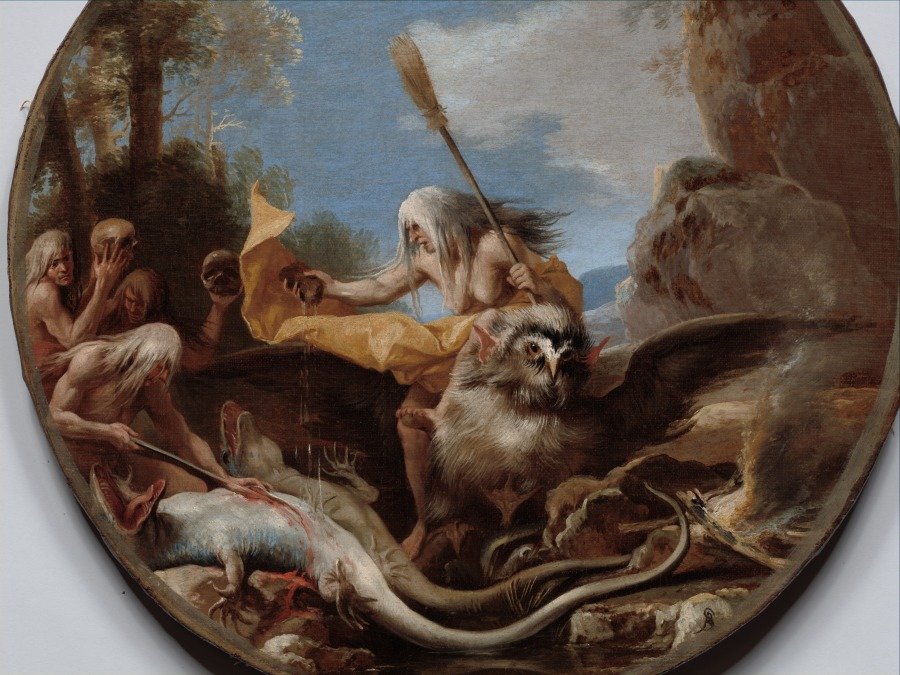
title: Scenes of Witchcraft: Day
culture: Italy, 17th century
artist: Salvator Rosa (Italian, 1615–1673)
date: c. 1645–1649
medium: oil on canvas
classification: Painting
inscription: Signed: "SR [monogram]"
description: Rosa's scene at noon showcases several hoary hags that exemplify his treatment of witches. Clutching skulls, wielding brooms, and slicing lizards, the witches prepare to travel to the Sabbath, an orgy of witches. One witch flays the skin of a thrashing lizard to extract the innards needed to concoct magical unguents, while her companions brandish skulls. Goats were the common mode of transportation for witches, but Rosa substitutes an owl, a harbinger of evil. Although Rosa foregrounds the violent cruelty of witchcraft, situating the grotesque hags in the full light of day introduces a comic aspect to the scene. Rosa's use of comedy and the unexpected to critique the world around him stemmed from the satirical poetry he wrote throughout his stay in Florence and his return to Rome in 1649. By lightening the palette and mood of the painting, Day reflects his interest in satire and his self-appointed role to expose and critique human folly.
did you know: The artist chose the painting's shape to reference the foundational role of the circle in practicing magic.